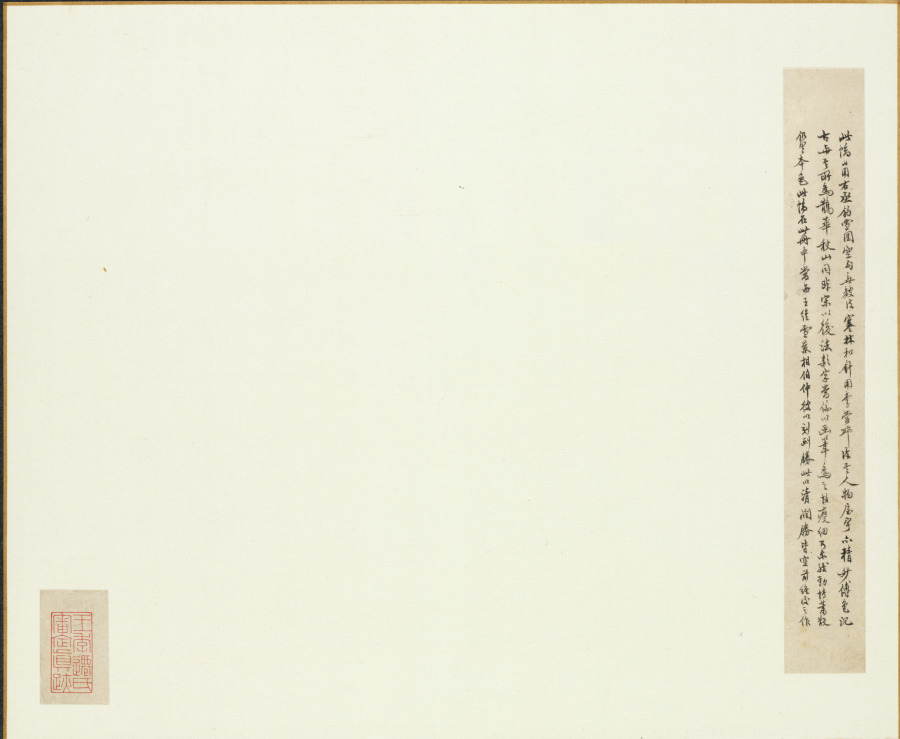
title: River Village: Fisherman's Joy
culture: China, Yuan dynasty (1271-1368)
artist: Zhao Mengfu (Chinese, 1254–1322)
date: c. 1302–3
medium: Fan painting mounted as album leaf; ink and color on silk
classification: Painting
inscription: 江村漁樂 子昂。 [印] 趙氏子昂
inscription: 1 colophon and 2 additional seals: 1 colophon, unsigned; 2 seals of C. C. Wang 王季遷 (1907–2003).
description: The artist of this blue-green–style landscape, Zhao Mengfu, was a southerner, versed in all fields of literati pursuits, such as calligraphy and connoisseurship. A princeling of the defeated Southern Song dynasty, he was nevertheless successfully recruited by Khubilai Khan to the Mongol court in the new capital, Dadu (modern Beijing), in 1286. This painting combines a distinctively southern flat watery landscape combined with features of the northern landscape tradition, notably the spiky trees, branches, and rough-surfaced rocks.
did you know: Various human elements can be found in the painting: two fishermen, an individual with a donkey, and someone in the house.